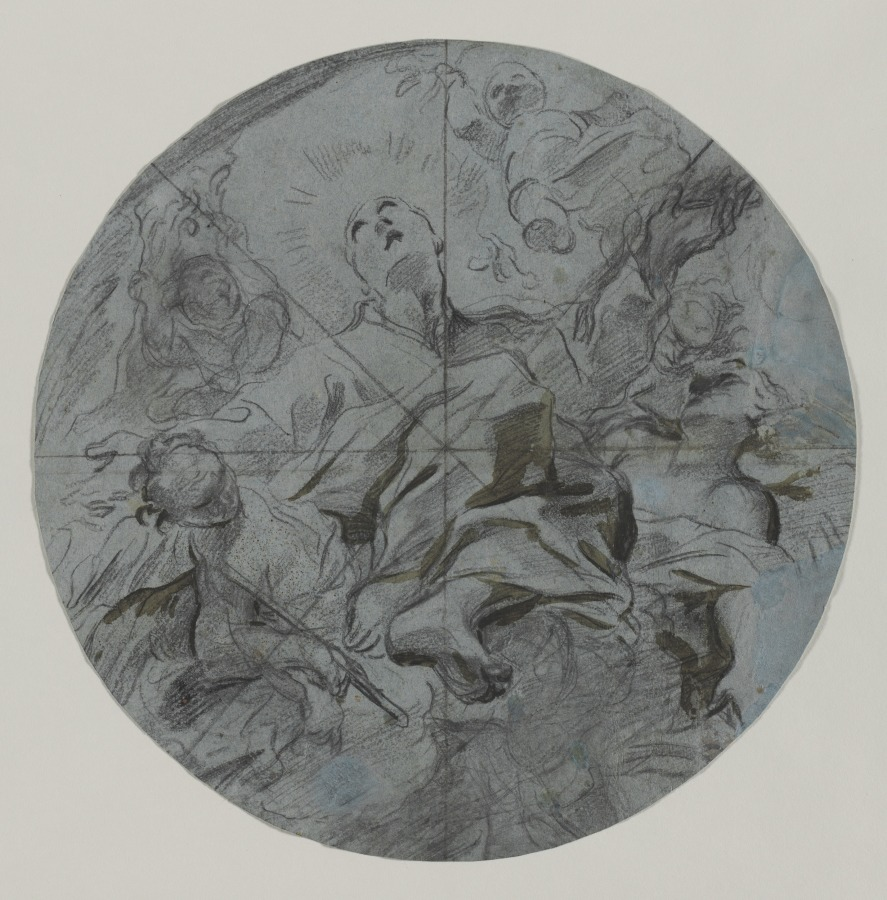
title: Apotheosis of a Saint (recto); Architectural Sketch(?) (verso)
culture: Italy, 17th century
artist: Giovanni Battista Benaschi (Italian, 1636–1688)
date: second half 17th century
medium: black chalk with brush and brown wash; divided into eighths with ruled black chalk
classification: Drawing